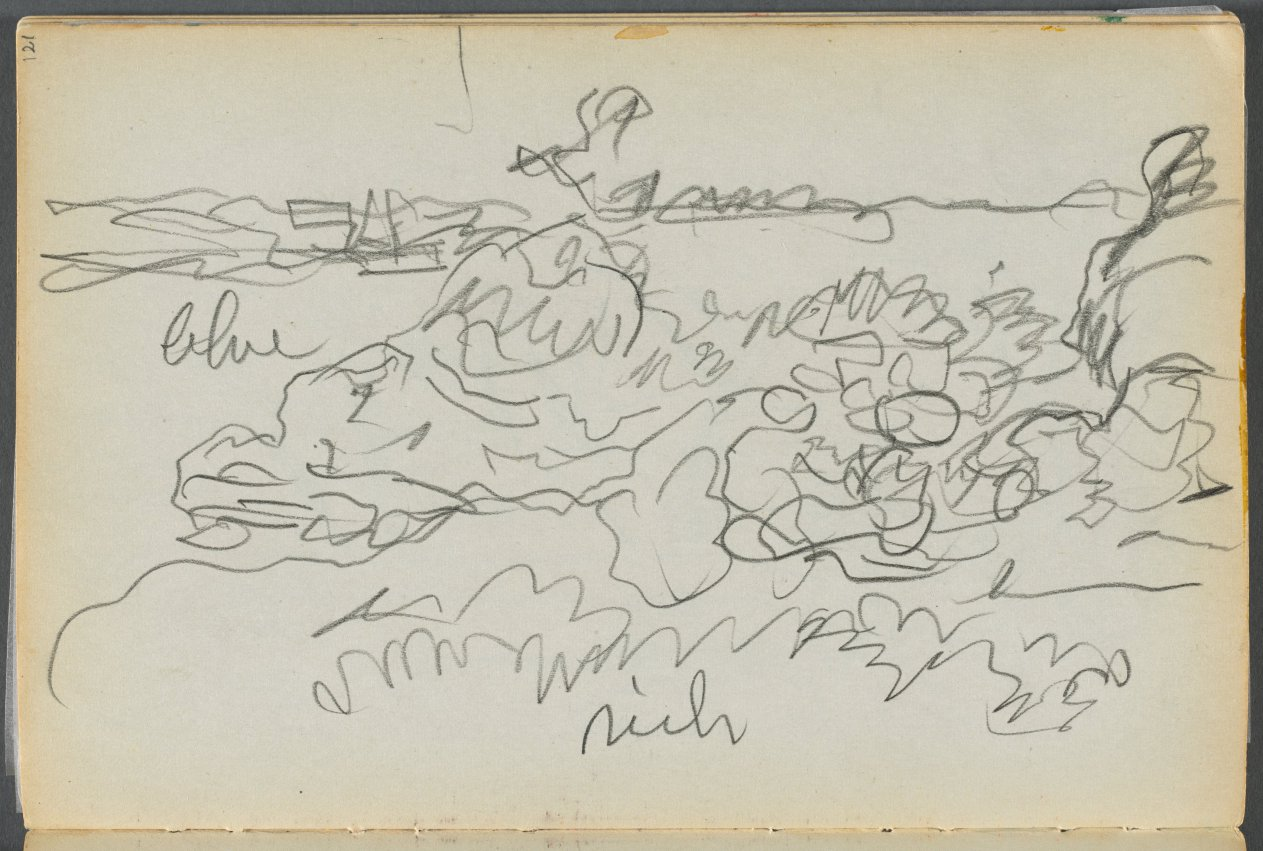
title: Sketchbook- The Granite Shore Hotel, Rockport, page 121: Shore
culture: America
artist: Maurice Prendergast (American, born Newfoundland [now Canada], 1858–1924)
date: 1905–10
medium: graphite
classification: Bound Volume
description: This sketchbook contains 72 pages of pencil drawings and 9 watercolors of Cape Ann. On the inside of the cover Prendergast wrote the address of the Granite Shore Hotel in Rockport, Massachusetts.